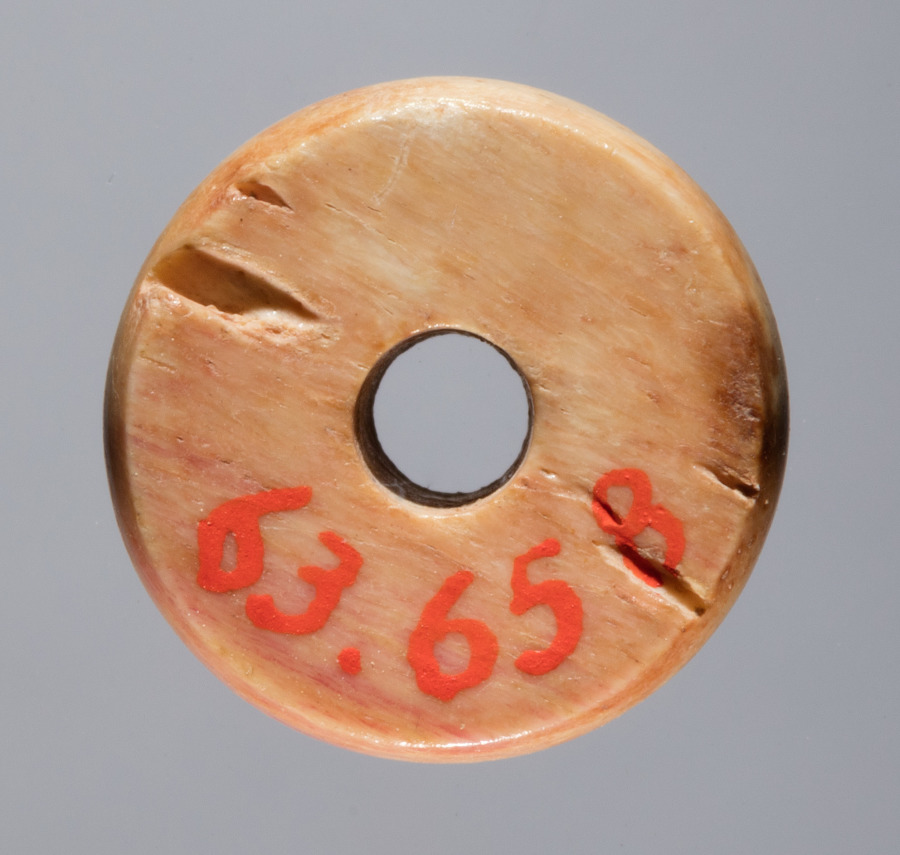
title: Spindle Whorl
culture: Iran, early Islamic period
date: 700s - 900s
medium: bone, incised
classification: Spindle Whorl